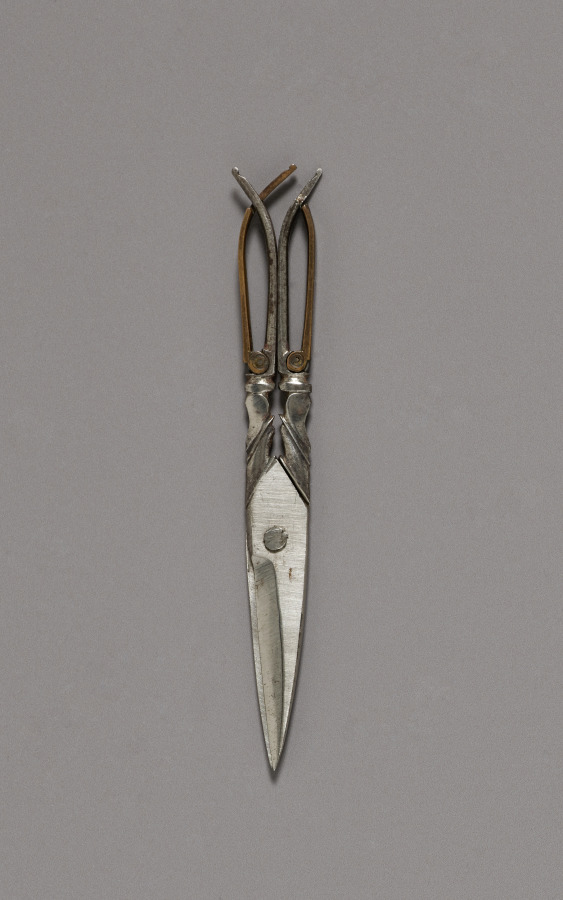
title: Scissors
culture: England, 18th century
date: c. 1770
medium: gilt metal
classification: Miscellaneous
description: Luxurious personal objects were an essential part of a privileged wardrobe during the 1700s and early 1800s, emphasizing their owner’s refinement and wealth. Especially popular were étuis, small ornamented cases containing miniature sewing, writing, or grooming implements that hung at a woman’s waist from an ornate clasp, known as a chatelaine. Despite its glittering surface, this small expensive set disguised a system based on the labor and suffering of enslaved or indentured people, whether in gold and stone mines or the shop where it was made.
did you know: Stored inside this case are grooming and writing instruments such as a clasp knife, scissors, an ivory tablet, a pencil, a threading needle used for lacing corsets, and an ear scoop.